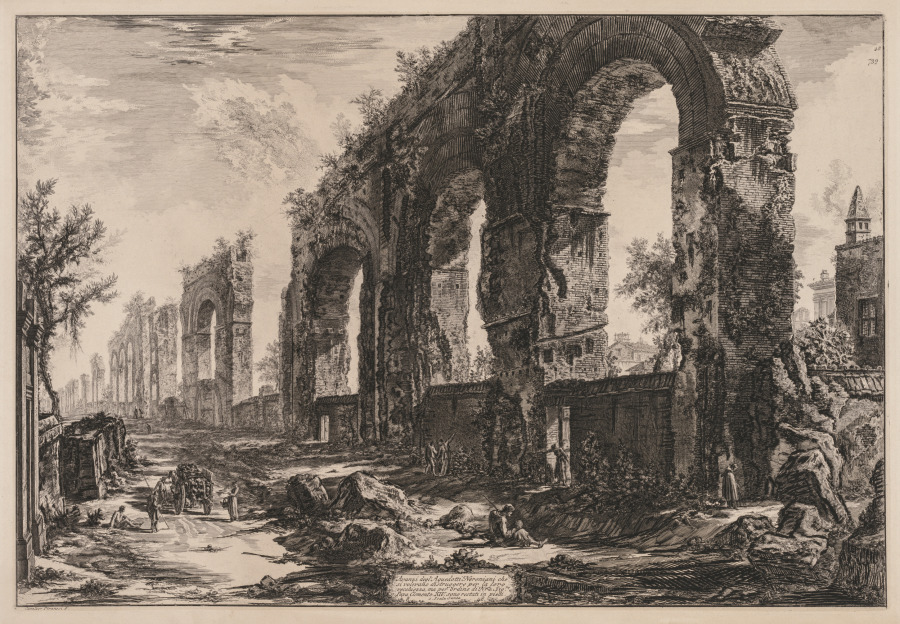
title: Views of Rome: The Aquaduct of Nero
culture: Italy, 18th century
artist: Giovanni Battista Piranesi (Italian, 1720–1778)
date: 1775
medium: etching and engraving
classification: Print